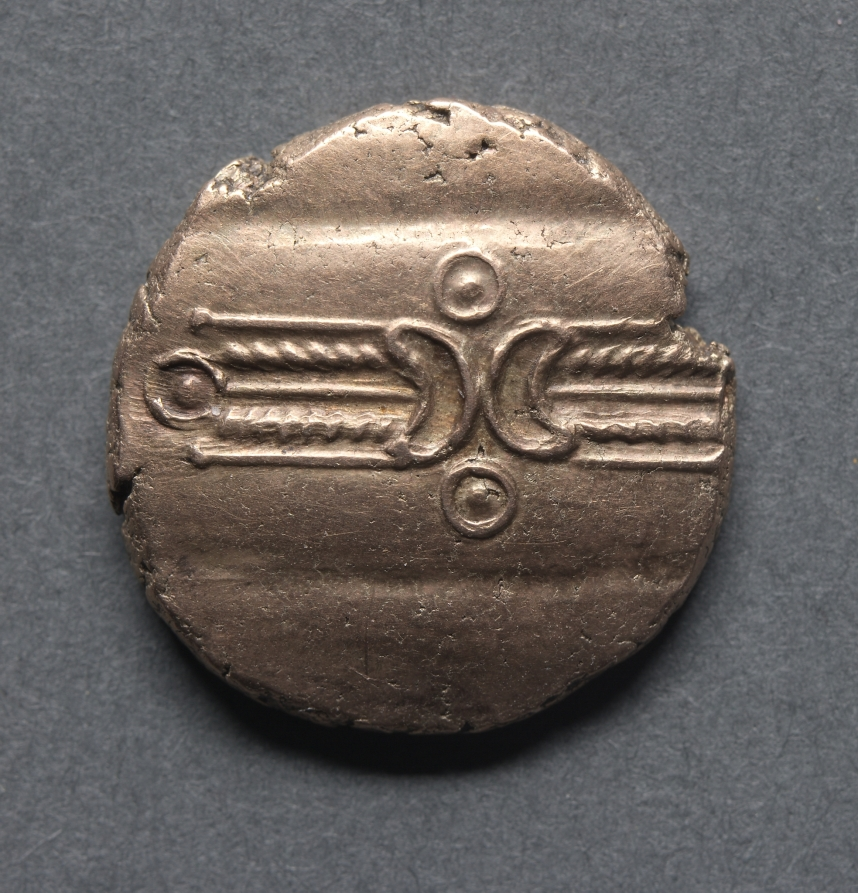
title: Dubnovellaunos Stater: Horse with Branch (reverse)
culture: England, Trinovantes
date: 20 BCE–10 CE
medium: gold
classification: Coins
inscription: "[DVBNO]VELLAVN."